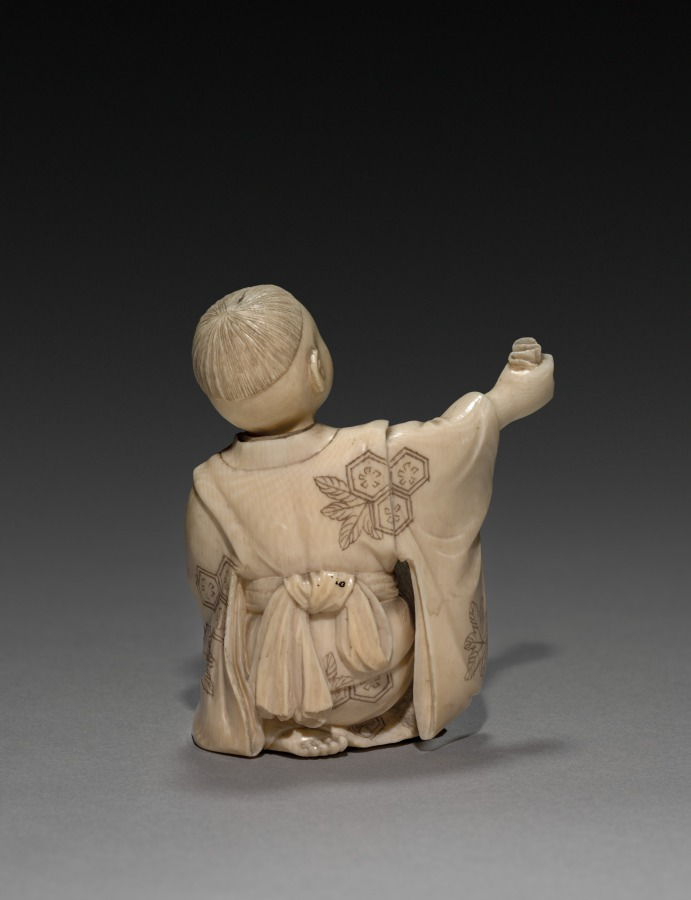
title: Kneeling Boy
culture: Japan, Meiji period (1868–1912)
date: early 1900s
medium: ivory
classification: Ivory